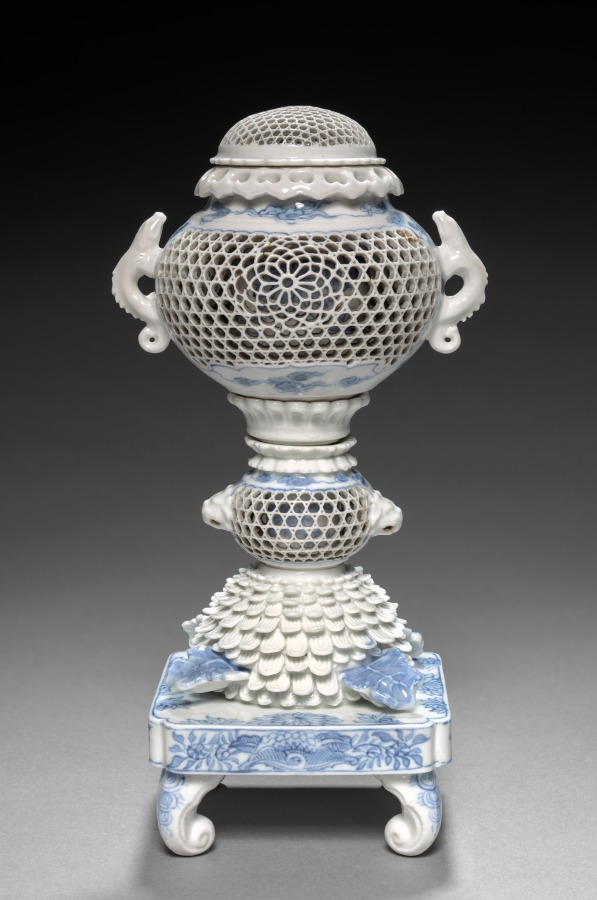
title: Chrysanthemum Censer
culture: Japan, Edo period (1615–1868)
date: 1700s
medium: Porcelain with underglaze blue (Hirado ware)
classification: Ceramic